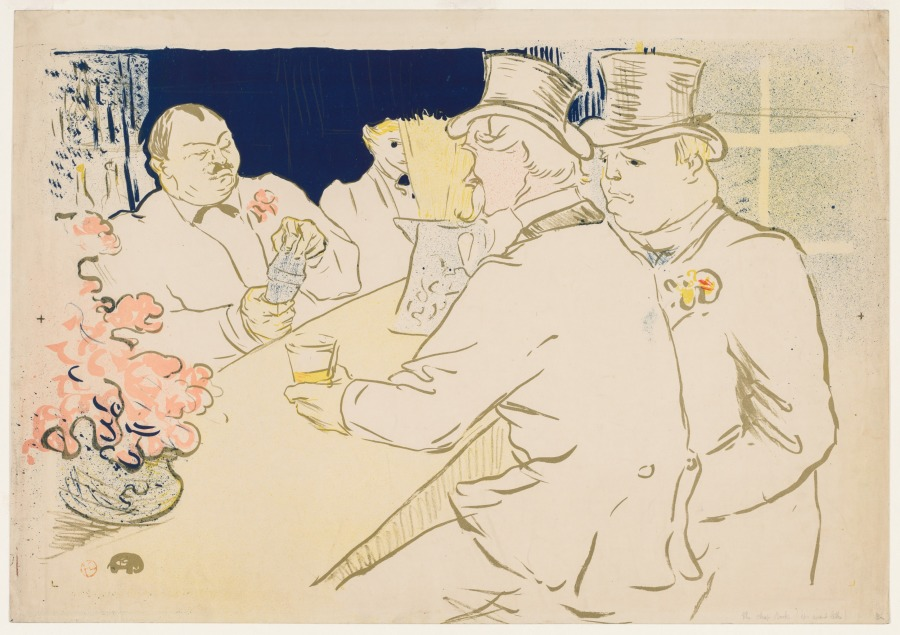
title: The Irish and American Bar, Rue Royale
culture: France, 19th century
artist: Henri de Toulouse-Lautrec (French, 1864–1901)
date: 1896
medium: lithograph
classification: Print